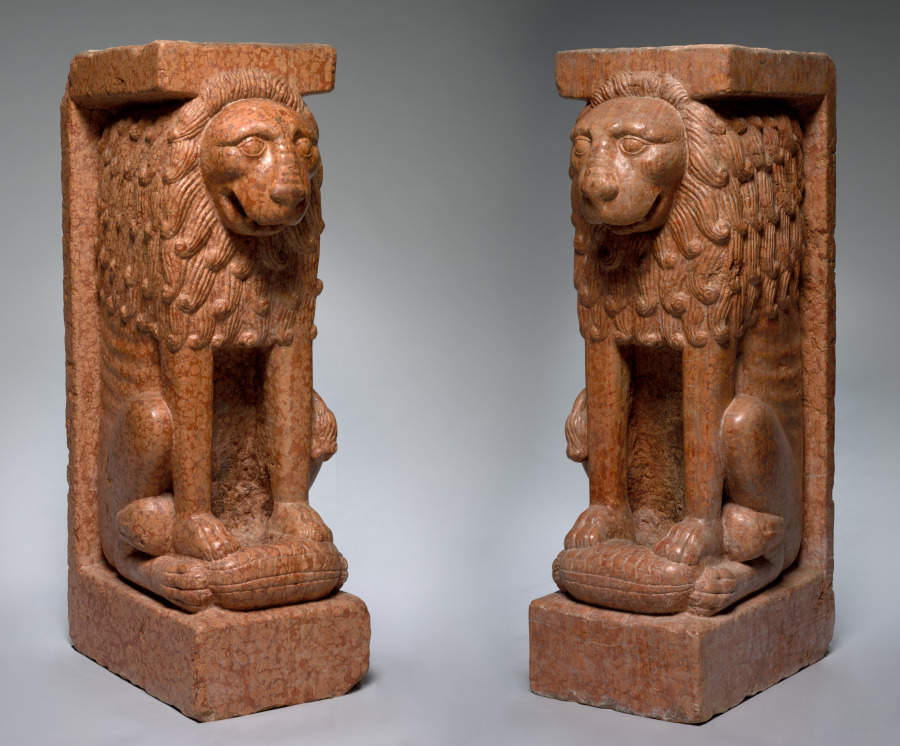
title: Supporting Lion (pair)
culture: Italy, style of the 13th century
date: style of the 1200s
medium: pink limestone (known as "Verona Marble")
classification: Sculpture